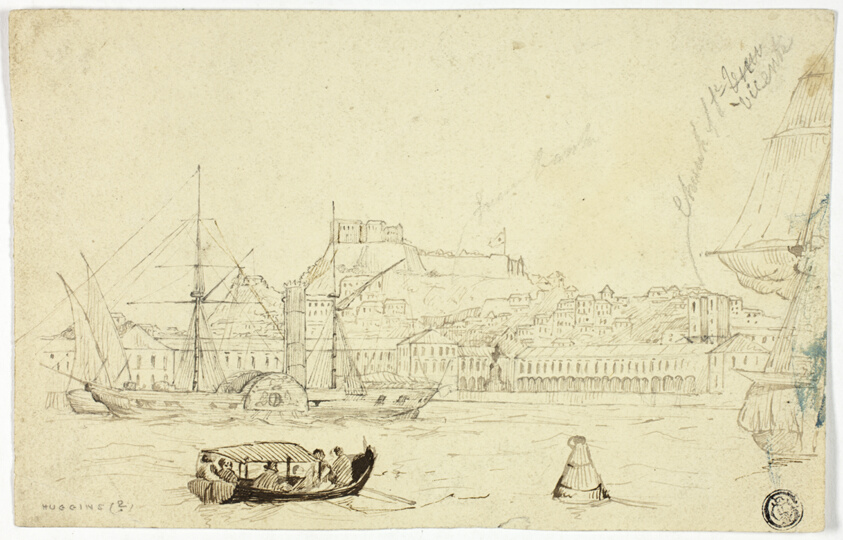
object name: Drawing and Watercolor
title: Seaport with Fortress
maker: Attributed to William John Huggins; English, 1781-1845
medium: Pen and brown and black ink, with touches of graphite, on cream wove paper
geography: England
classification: pen and ink drawings; drawings (visual works); prints and drawing